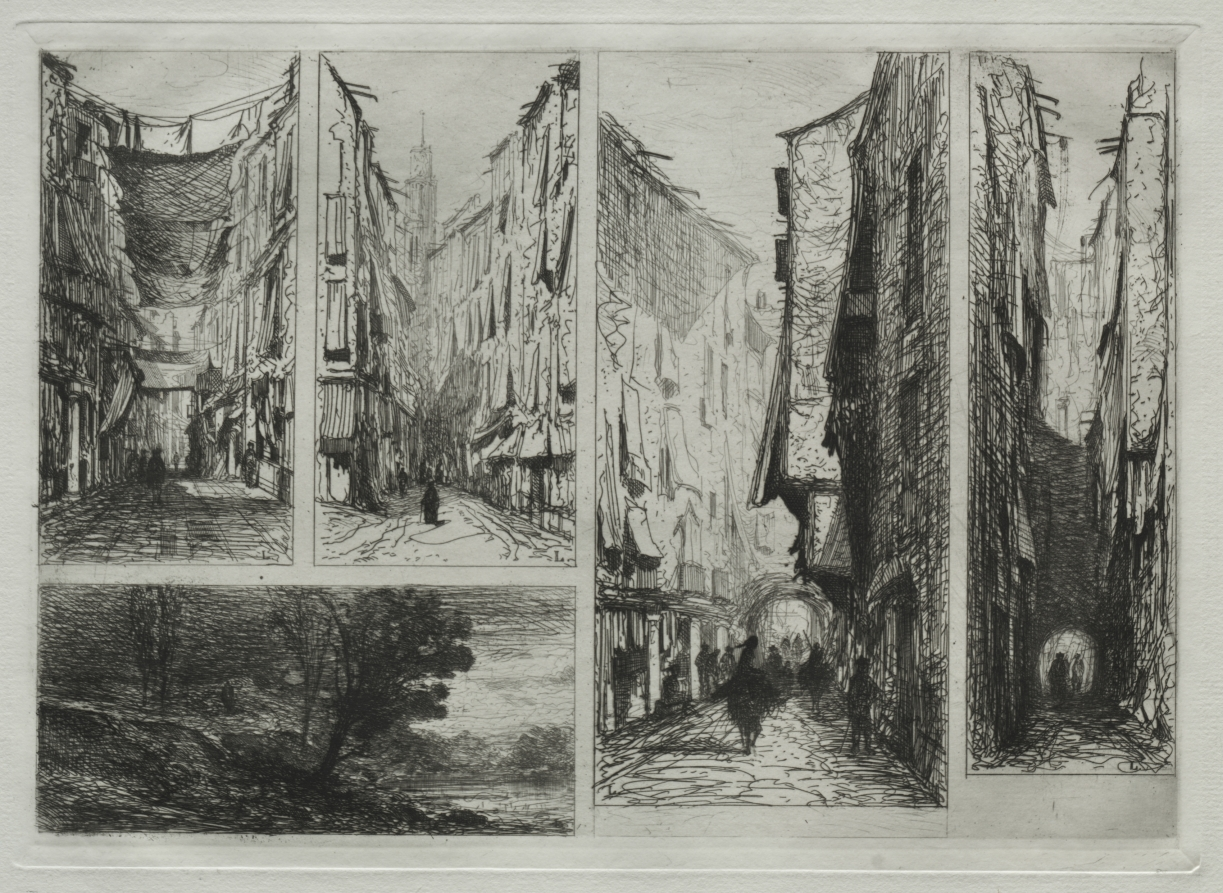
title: Bordeaux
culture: France, 19th century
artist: Maxime Lalanne (French, 1827–1886)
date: c. 1853–86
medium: etching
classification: Print